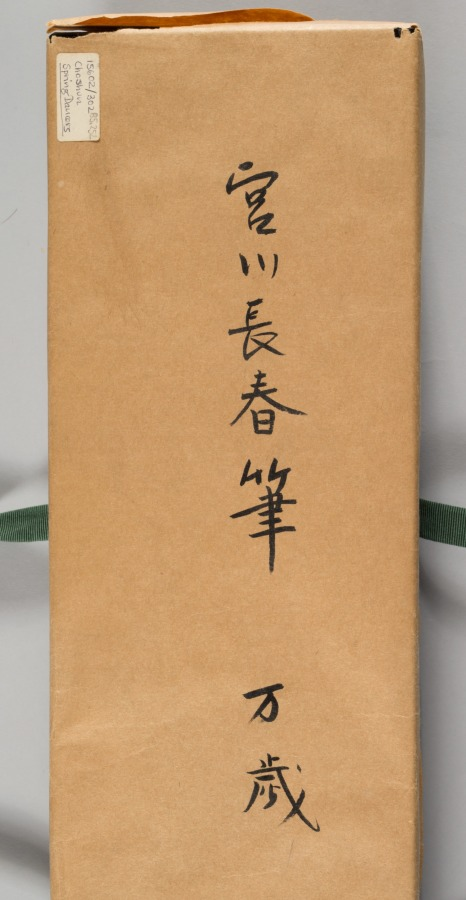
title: Spring Dancers (Manzai)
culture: Japan, Edo period (1615–1868)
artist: Miyagawa Chōshun (Japanese, 1683–1753)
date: early to mid-1700s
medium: hanging scroll; ink and color on paper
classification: Painting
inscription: Artist's signature and gourd-shaped seal lower right corner.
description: Manzai is the Japanese term for wandering comic dancers. The painting depicts one of the traditional pleasures of the spring season.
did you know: One performer is playing a hand-held drum, like CMA 1918.349.